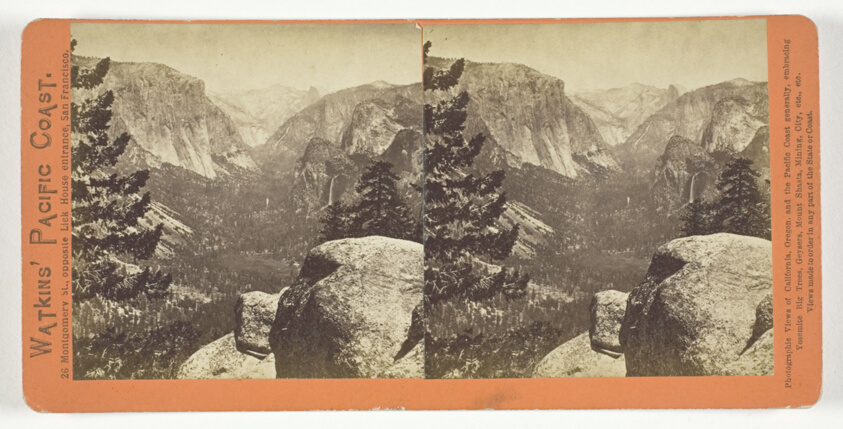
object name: Photograph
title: The Yosemite Valley, form the Mariposa Trail, from the series "Watkins' Pacific Coast"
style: 19th century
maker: Carleton E. Watkins; American, 1829-1916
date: 1861/76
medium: Albumen print, stereo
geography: United States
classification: stereograph (albumen); albumen silver print; photographic process; photography; photograph